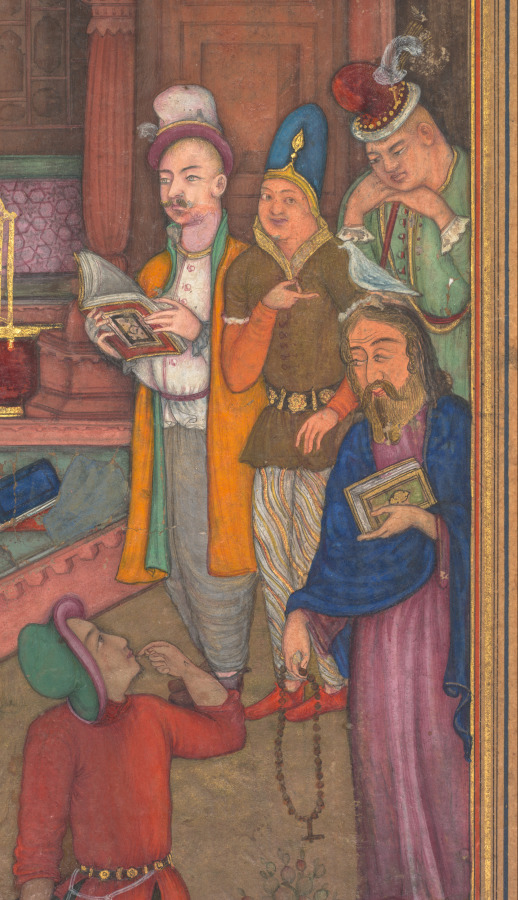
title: John the Baptist recognizes Christ by the appearance of a dove (folio 50 verso), from a Mirror of Holiness (Mir’at al-quds) of Father Jerome Xavier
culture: Mughal India, Allahabad, made for Prince Salim (1569–1627)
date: 1602–4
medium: Gum tempera, ink, and gold on paper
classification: Manuscript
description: Wearing the black robes and cap of a Jesuit priest, John the Baptist sits in a well-appointed Mughal-style courtyard. According to Father Jerome’s text, John recognizes Jesus by the dove who sits on his head. Possibly Father Jerome intended to relate the Gospel account that describes the dove of the Holy Spirit as hovering in the air above his head. The artist’s own reactions to this passage may be reflected in the expressions and gestures of the onlookers, who seem incredulous and bemused at this sign.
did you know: Jesus holds a rosary with a cross even in scenes prior to his crucifixion.